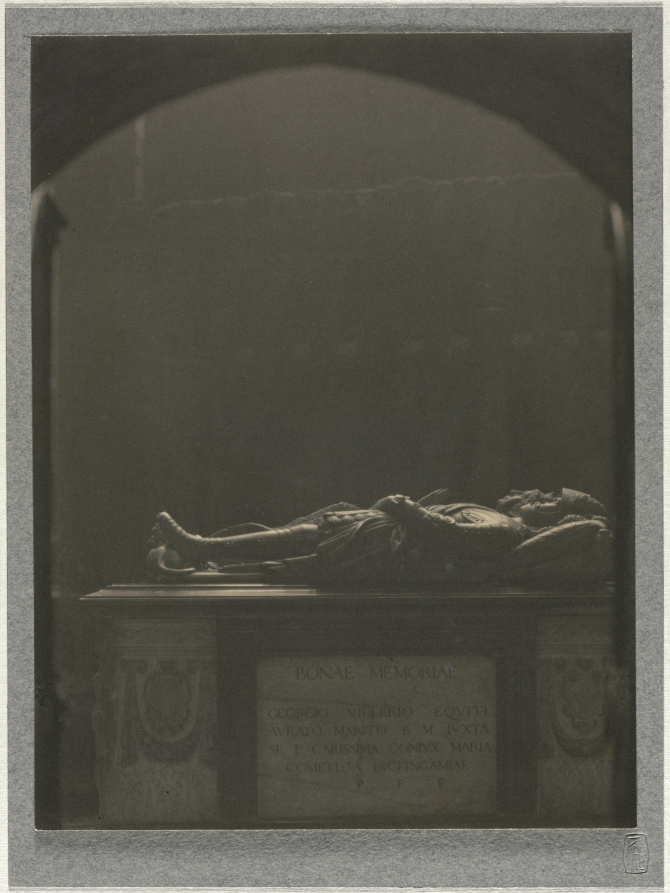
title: Westminster Abbey, Tomb of Sir Georges Villiers (d. 1605)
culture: England, 20th century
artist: Frederick H. Evans (British, 1853–1943)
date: c. 1900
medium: platinum print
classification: Photograph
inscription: Written in blue ink on verso of mount on attached paper w/artist's blindstamp: "South Ambulatory: / Tomb of Sir George Villiers, d.1605 / -in Chapel of St. Nicholas.--"